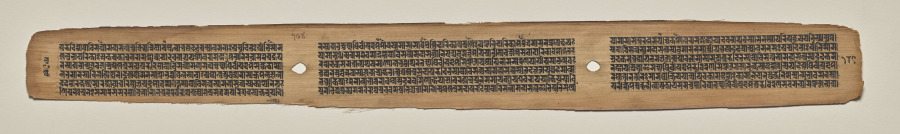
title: Text, folio 184 (verso), from a Manuscript of the Perfection of Wisdom in Eight Thousand Lines (Ashtasahasrika Prajnaparamita-sutra)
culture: Eastern India, Bihar, Vikramashila Monastery. Painting: Nepal, Kathmandu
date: Sunday, September 14, 1119 (year 239 of the Newar Samvat in the month of Ashvina)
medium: gum tempera and ink on palm leaves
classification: Painting